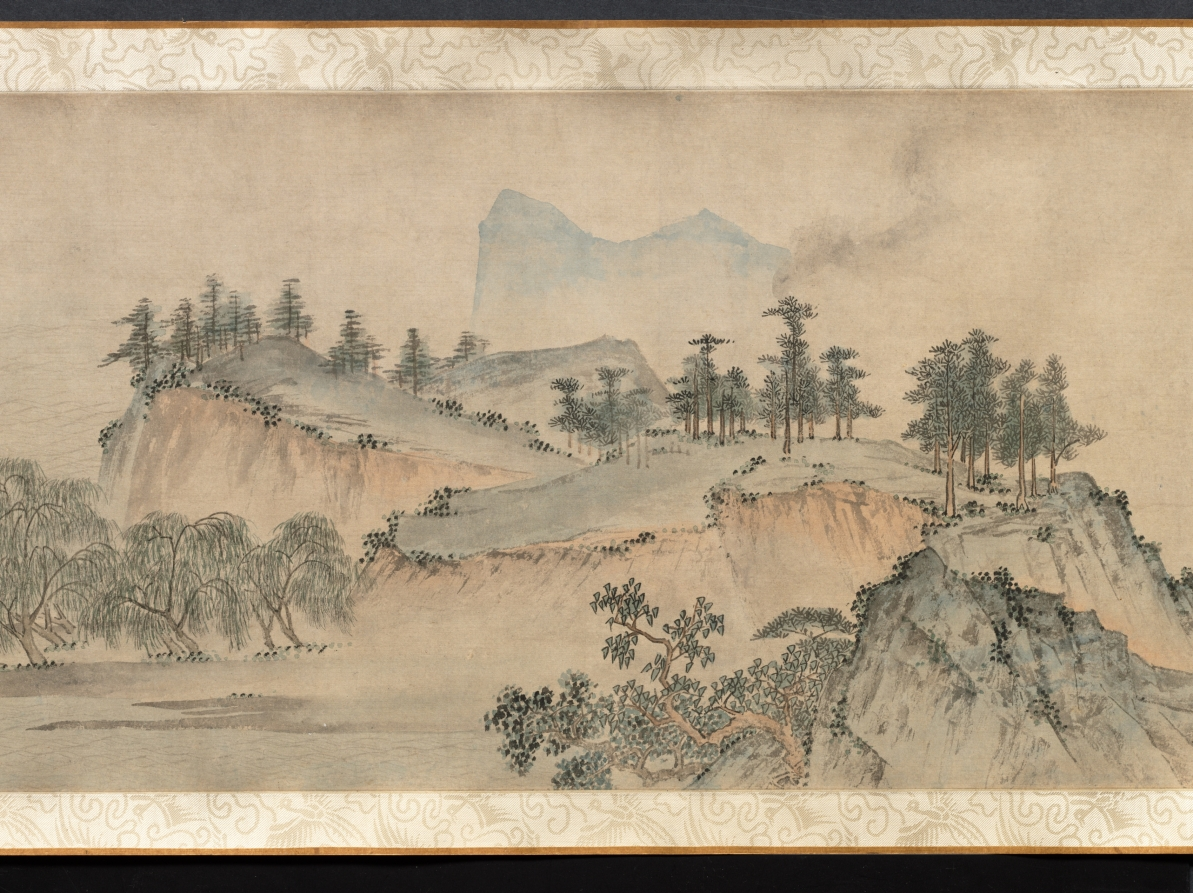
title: Ten Thousand Li of the Yangzi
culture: China, Ming dynasty (1368–1644)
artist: Dai Jin (Chinese, 1388–1462)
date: c. 1400s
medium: Handscroll; ink and color on paper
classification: Painting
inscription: Two colophons at end. Artist's seals: Dai Jin 戴進 and Wenjin 文進.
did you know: Dai Jin is traditionally considered the founder of the Zhe School, a style of landscape painting.